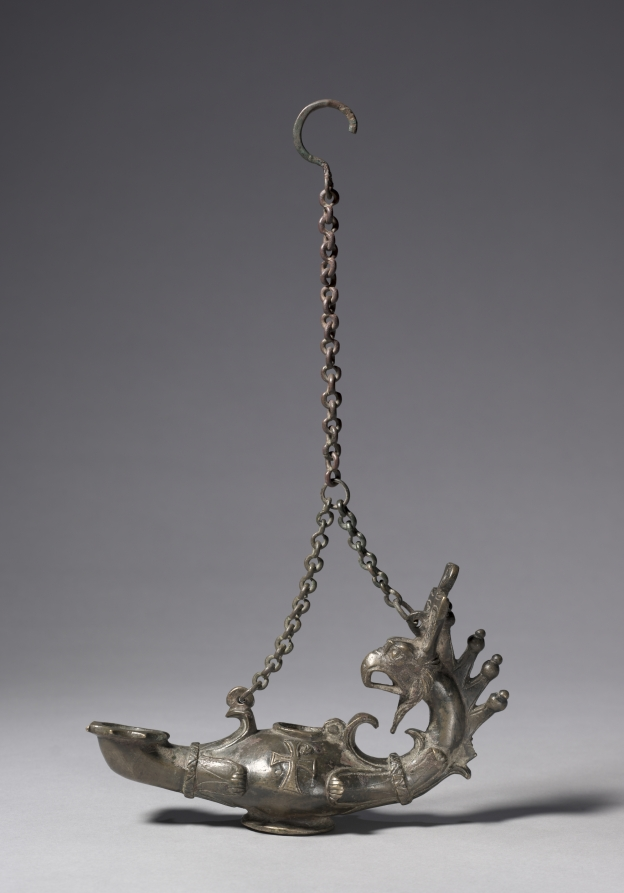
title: Lamp with Griffin-Head Handle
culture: Byzantium, Syria(?), Byzantine period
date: 300s–400s CE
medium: bronze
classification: Metalwork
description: Bronze oil lamps with griffin-head handles and Christian symbolic decoration were common from the 4th through the 6th centuries and have survived in considerable numbers all over the Mediterranean world. The popularity of griffins, ancient mythological creatures with the body of a lion and head and wings of an eagle, is probably rooted in their traditional role as powerful guardian figures and protectors. On this Early Byzantine bronze lamp, the griffin seems to have functioned similarly as a guardian of the flame and a keeper of the light. The decoration of an everyday utilitarian object with both pagan and Christian symbols of protection may mark an effort to enhance its power.